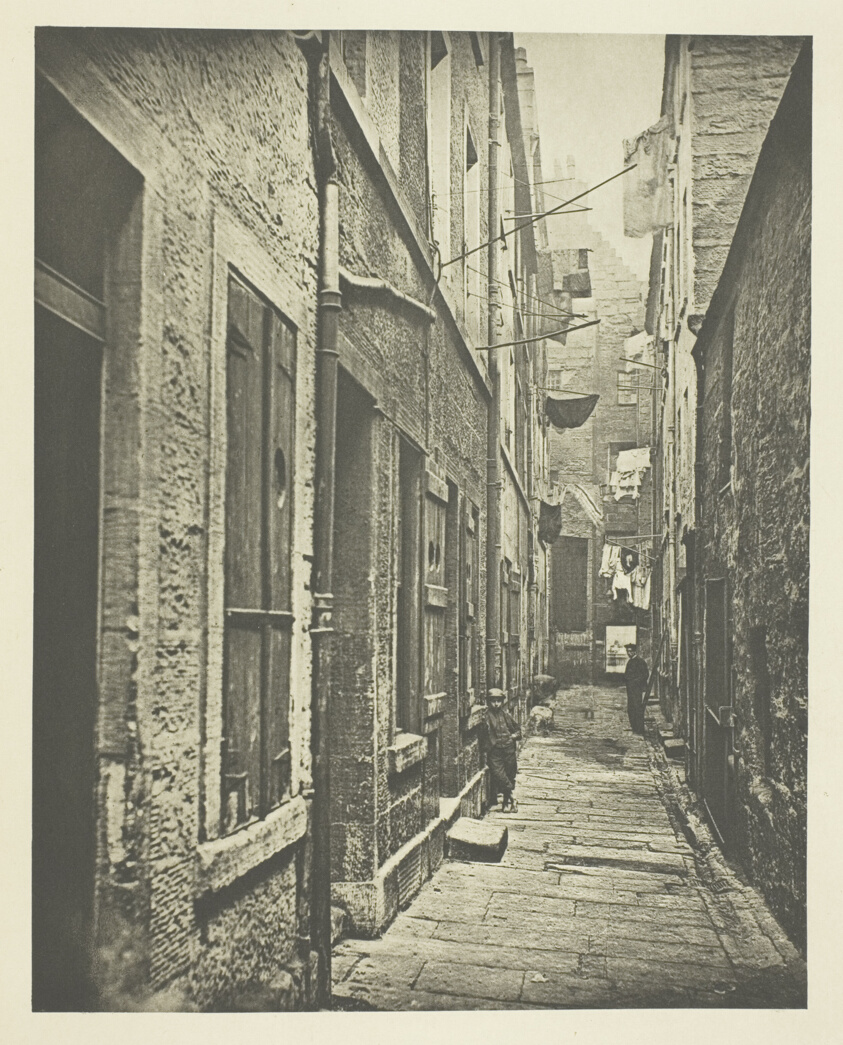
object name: Photograph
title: Close No. 65 High Street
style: 19th century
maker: Thomas Annan (Scottish, 1829–1887)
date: 1868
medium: Photogravure, plate 13 from the book "The Old Closes & Streets of Glasgow" (1900)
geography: Scotland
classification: photograph; photography